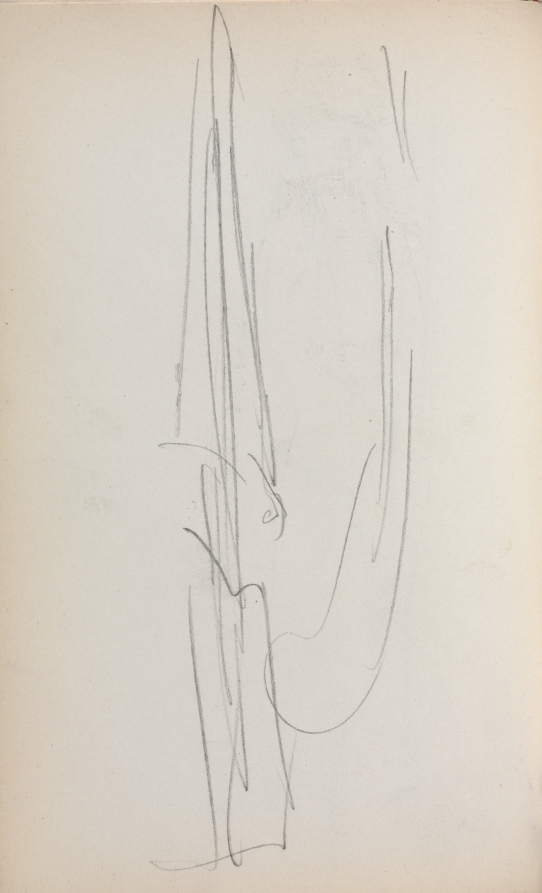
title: Italian Sketchbook: Sail (page 71)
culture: America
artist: Maurice Prendergast (American, born Newfoundland [now Canada], 1858–1924)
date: 1898–1899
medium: pencil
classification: Bound Volume